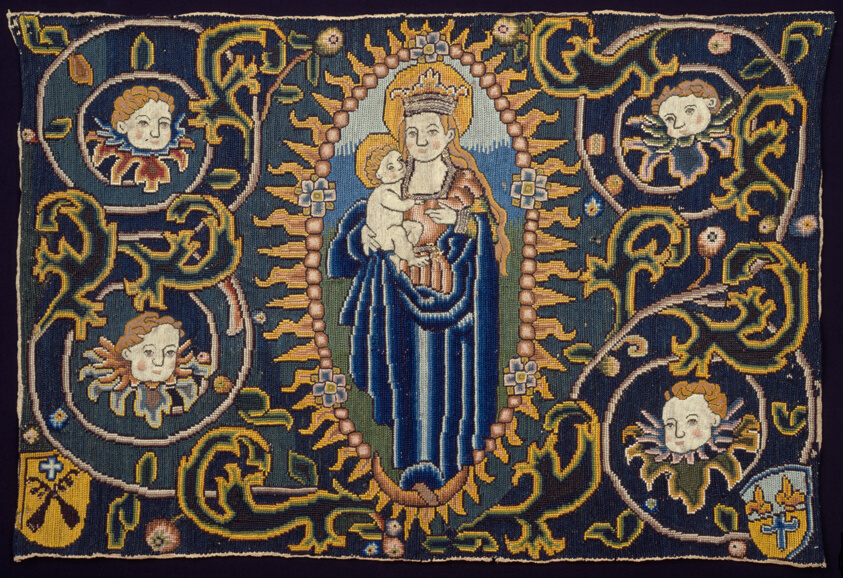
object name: Textile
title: Panel Depicting Madonna and Child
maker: Switzerland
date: 16th century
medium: Hemp, plain weave; appliquéd with silk, gilt-metal strip and gilt-metal-strip-wrapped silk, plain weave and oblique interlaced tapes; embroidered with wool in cross, reverse tent and tent stitches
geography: Switzerland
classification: textile; needlework (visual works)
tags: religious scenes